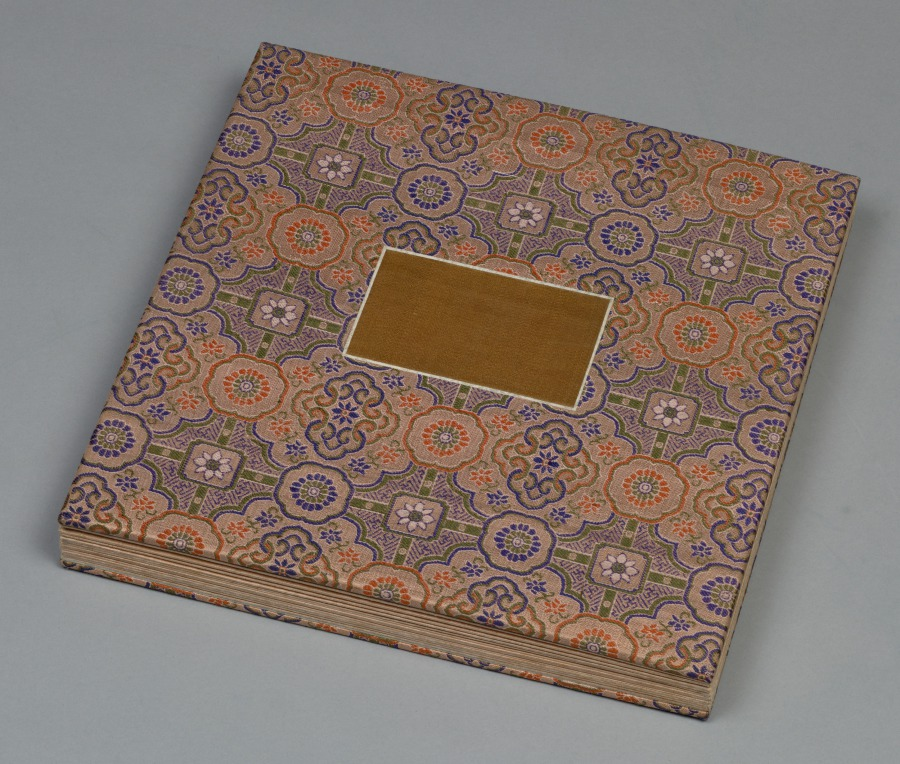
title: Album of Textile Samples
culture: Japan and China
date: 1700s–1800s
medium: silk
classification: Textile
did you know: This album has 26 pages containing 128 mounted Chinese or Japanese textile samples.